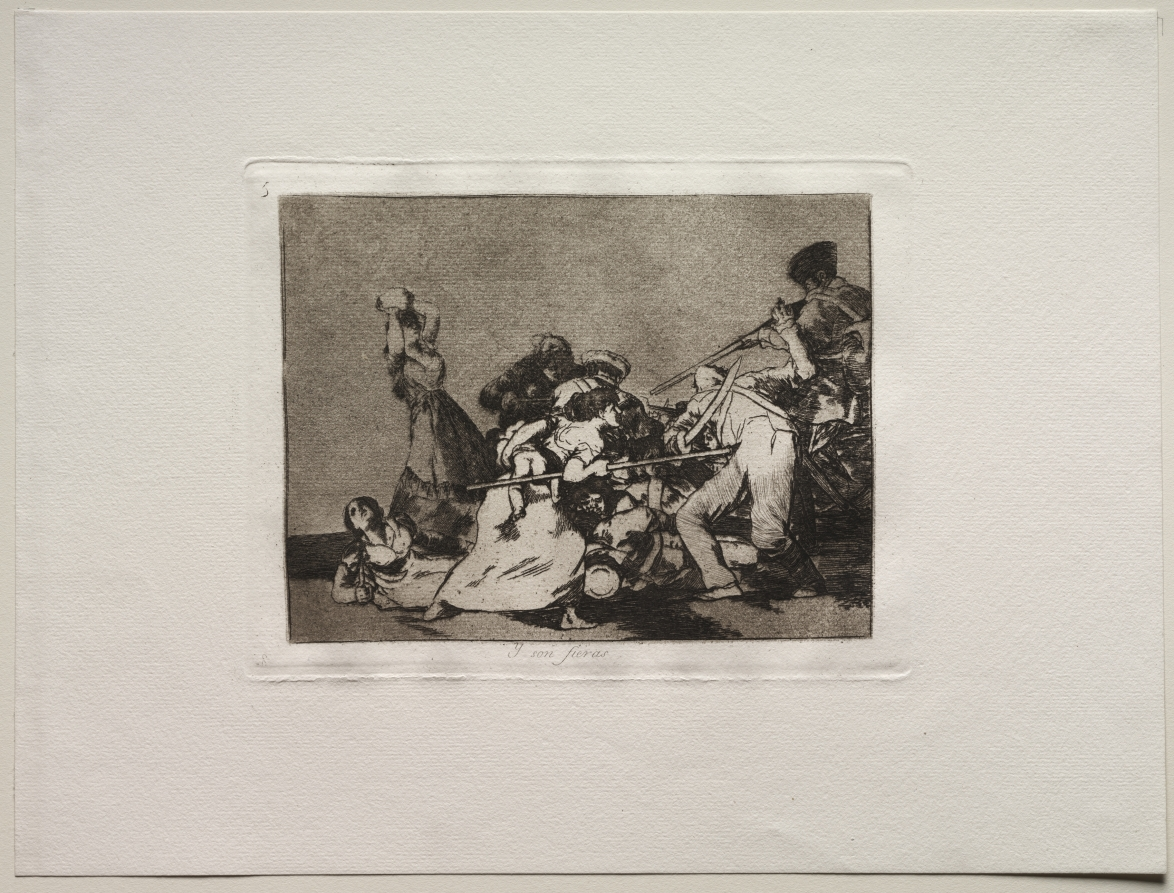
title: The Horrors of War: And They are Like Wild Beasts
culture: Spain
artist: Francisco de Goya (Spanish, 1746–1828)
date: c. 1810–20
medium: etching and aquatint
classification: Print